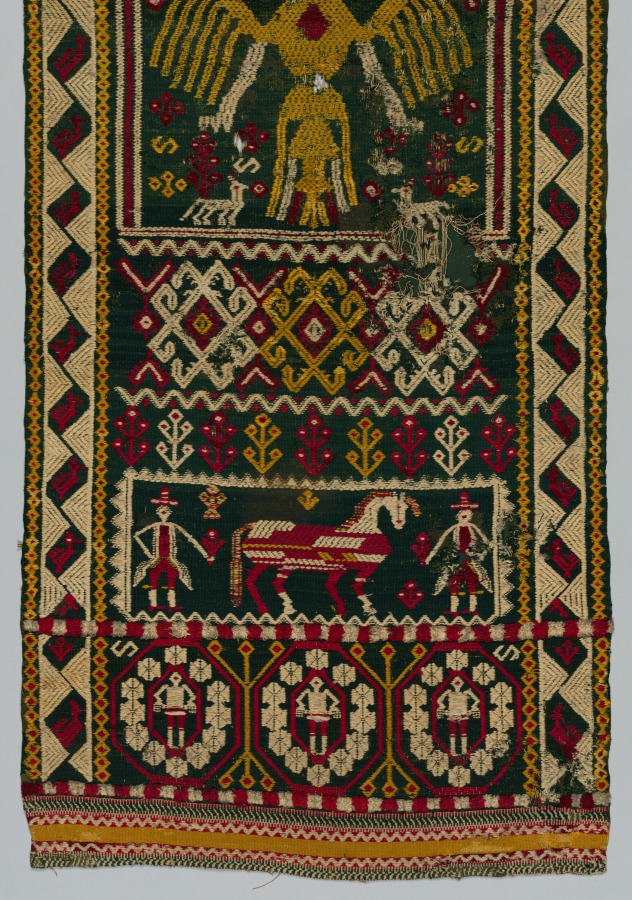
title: Woven Chest or Bed Cover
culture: Italy, Terra di Lavoro, 18th century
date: 1700s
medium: embroidery; wool on linen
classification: Textile